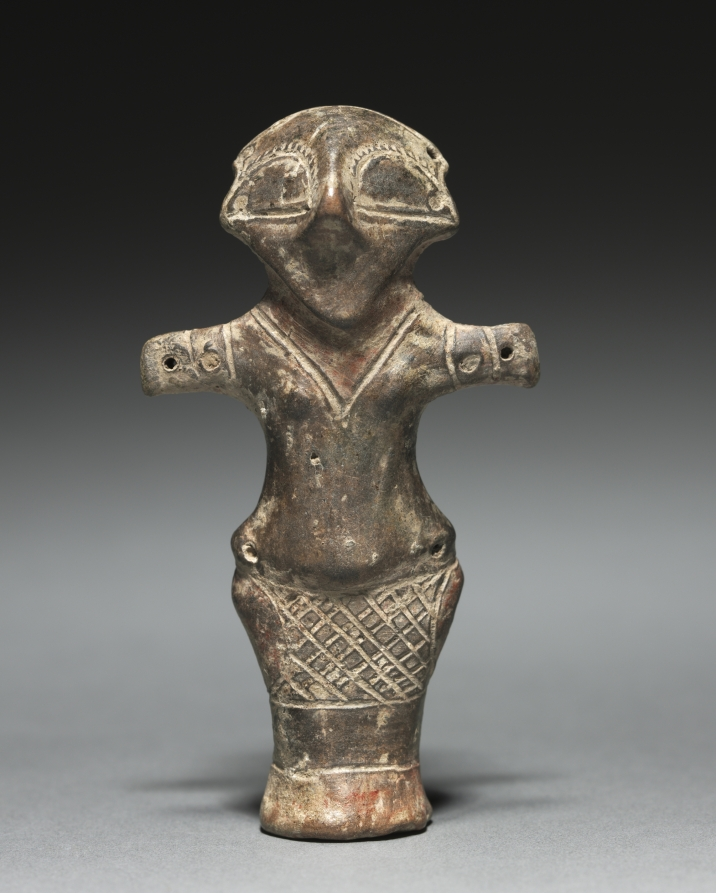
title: Vinca Idol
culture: Serbia, Vinça culture, Neolithic Era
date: 4000 BCE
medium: fired clay with paint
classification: Ceramic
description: This statuette, probably a cult idol, dates to the Neolithic Era which saw the development of farming and human technology. It is extraordinarily well preserved and derives from the settlement at Vinca in modern Serbia. This flourishing culture was the largest known in Europe at that time, extending along the Danube into the Balkans and Central Europe. Thousands of clay statuettes have been discovered in the region's Vinca settlements suggestive of the intense magic-religious practices within the Vinca culture. This statuette is anthropomorphic, or human-shaped, and is presumed to have been used for ritual purposes. The use of red paint is typical of Vinca Neolithic figurines, and few have survived in such excellent condition.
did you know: This figurine depicts a female deity with a protruding belly and plump buttocks.